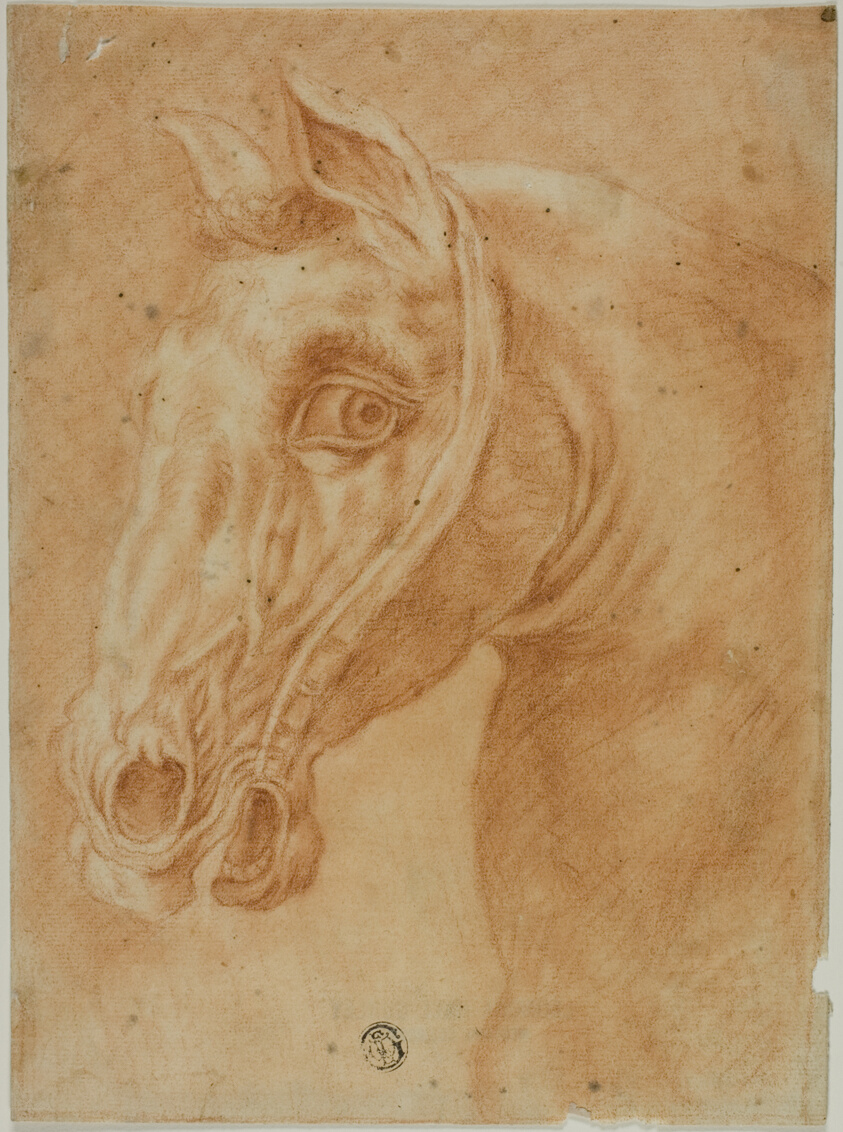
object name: Drawing and Watercolor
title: Head of a Horse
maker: Style of Charles Parrocel (French, 1688-1752)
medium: Red chalk, with stumping, on cream laid paper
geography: France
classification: chalk; drawings (visual works); prints and drawing